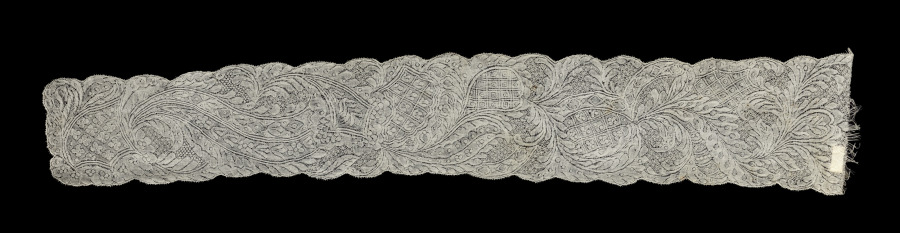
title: Lace Lappet (one of a pair)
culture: Belgium, Binche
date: 1700s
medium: Linen: bobbin lace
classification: Lace